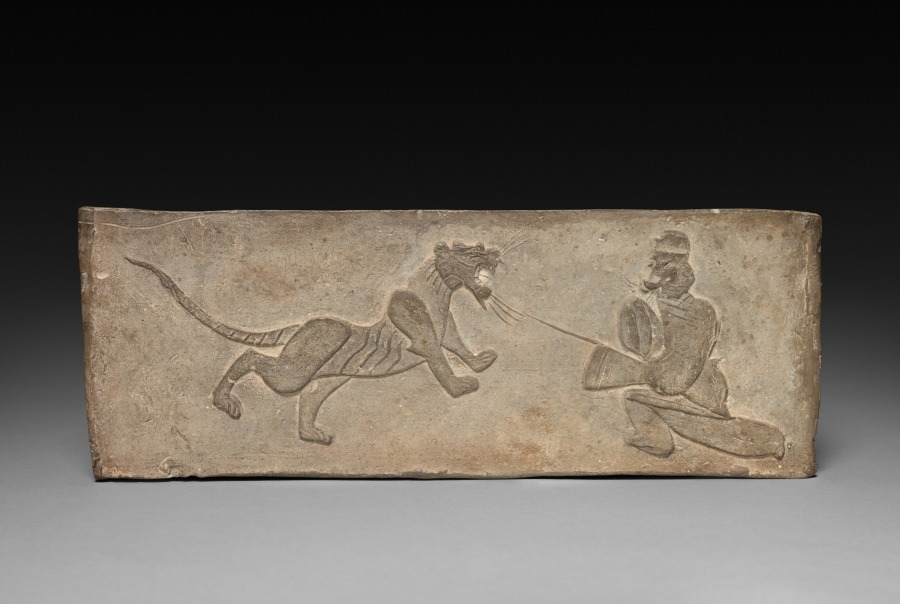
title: Panel from Model Cooking Stove: Lancer Jousting with a Tiger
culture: China, from a tomb in Xi'an, Shaanxi province, Western Han dynasty (206 BCE–8 CE)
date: 100–1 BCE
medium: earthenware with impressed relief decoration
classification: Ceramic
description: Han dynasty tombs were often furnished with grave goods to provide the deceased with items for the afterlife. Four earthenware panels were made in molds and then joined together to make a miniature model of a stove. Opposite one another on the two long sides of the stove are representations of the eastern dragon and western tiger, here fended off by a lancer.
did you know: Han dynasty tombs were often furnished with grave goods to provide the deceased with items for the afterlife.